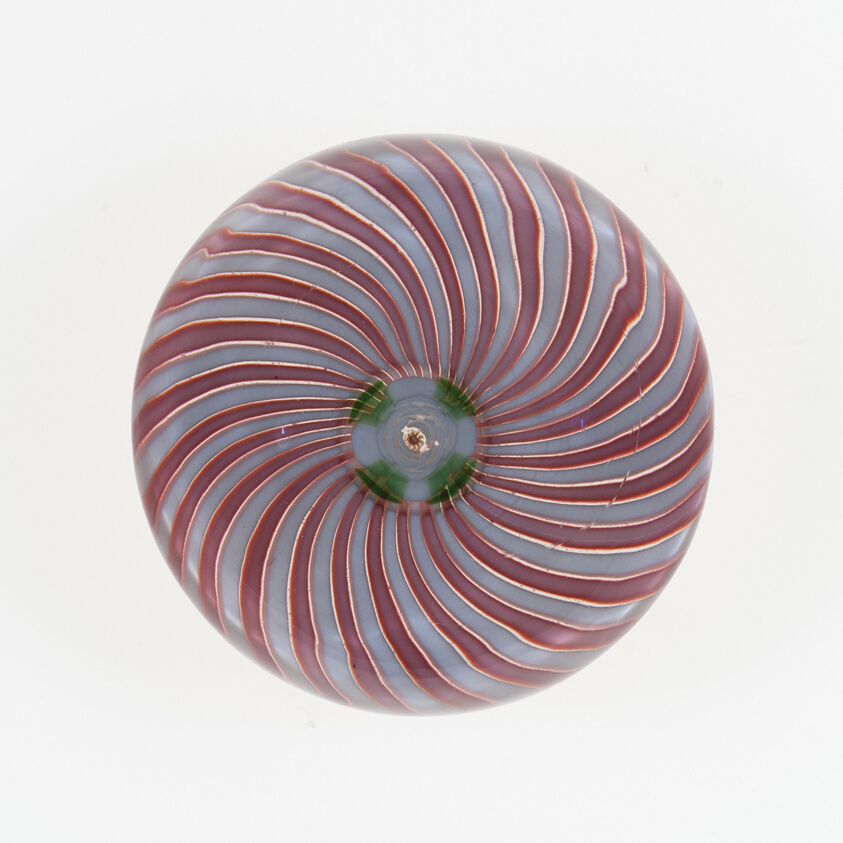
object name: Glass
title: Paperweight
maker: Clichy Glassworks (Cristalleries de Clichy); Clichy, France, 1837-1885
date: c. 1848–55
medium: Glass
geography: Clichy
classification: paperweight; lampwork; european decorative arts; glass